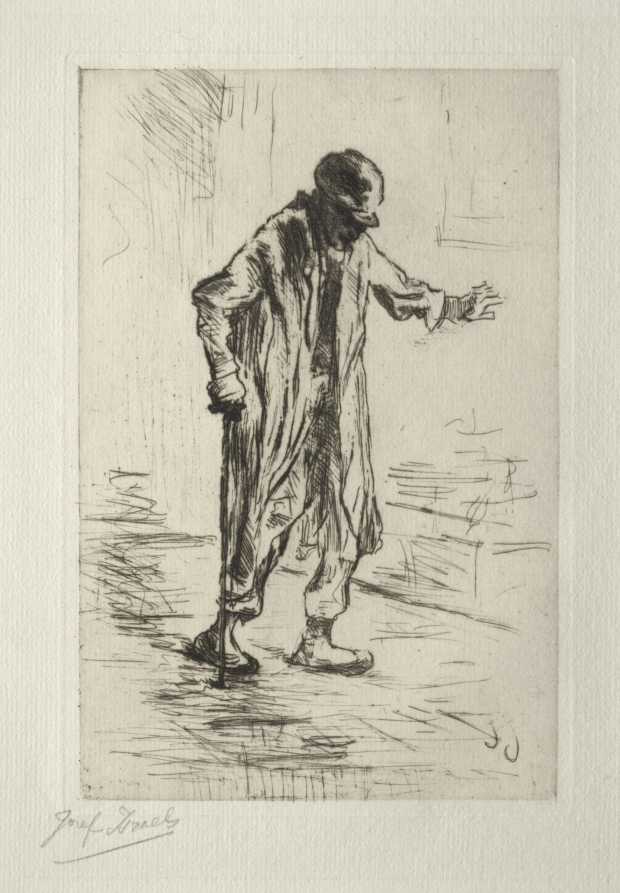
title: Stumbling Old Man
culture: Netherlands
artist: Jozef Israëls (Dutch, 1824–1911)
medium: etching and drypoint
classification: Print